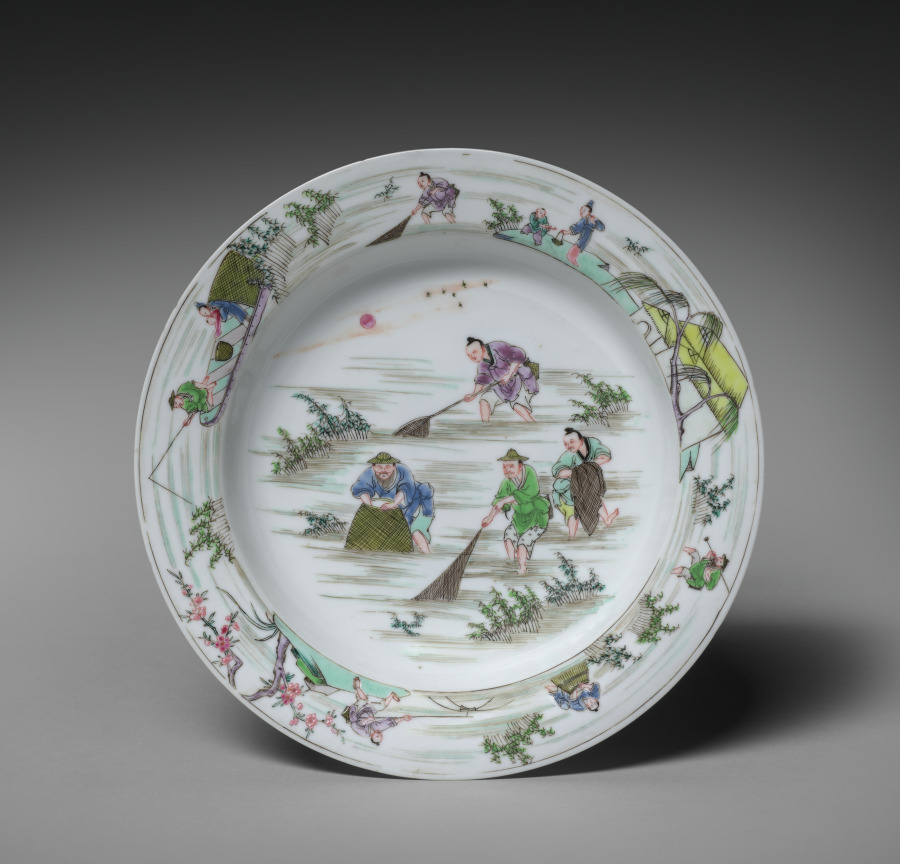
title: Fishermen Plate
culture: China, Qing dynasty (1644–1911), Yongzheng reign (1723–35)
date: c. 1730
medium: porcelain with famille rose enamel overglaze decoration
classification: Ceramic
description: The plate shows four fishermen holding nets and creel. The plate was made during the Yongzheng reign known for its fine porcelain decoration in famille rose colors. Similar scenes of fishermen on paintings of the Ming and Qing period illustrate the popularity of the theme and its adoption by craftsmen and potters.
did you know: The labels on the plate’s base testify the plate was in the former Garland and the Morgan collections.